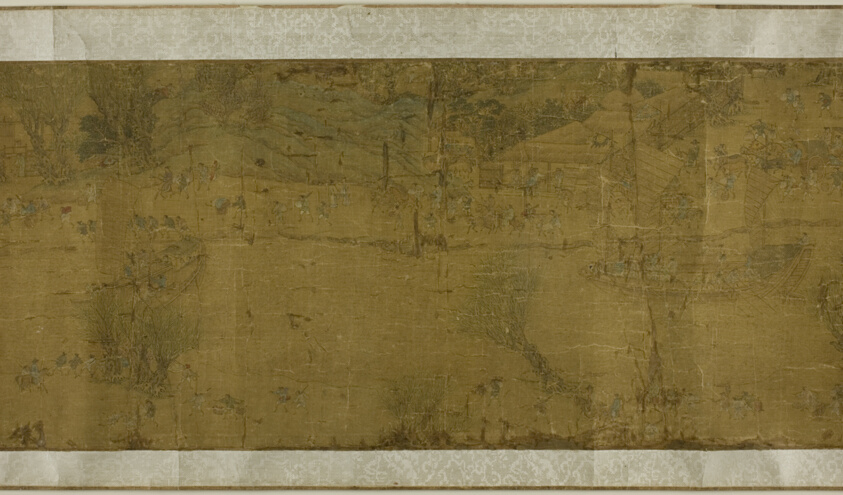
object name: Painting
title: Going up the River at the Qingming Festival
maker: Attributed to Qiu Ying (Chinese, c.1495-1551)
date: Ming Dynasty (1369–1644); late 16th c. 1495–1551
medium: Handscroll; ink and color on silk.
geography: China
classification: handscroll; painting; asian art